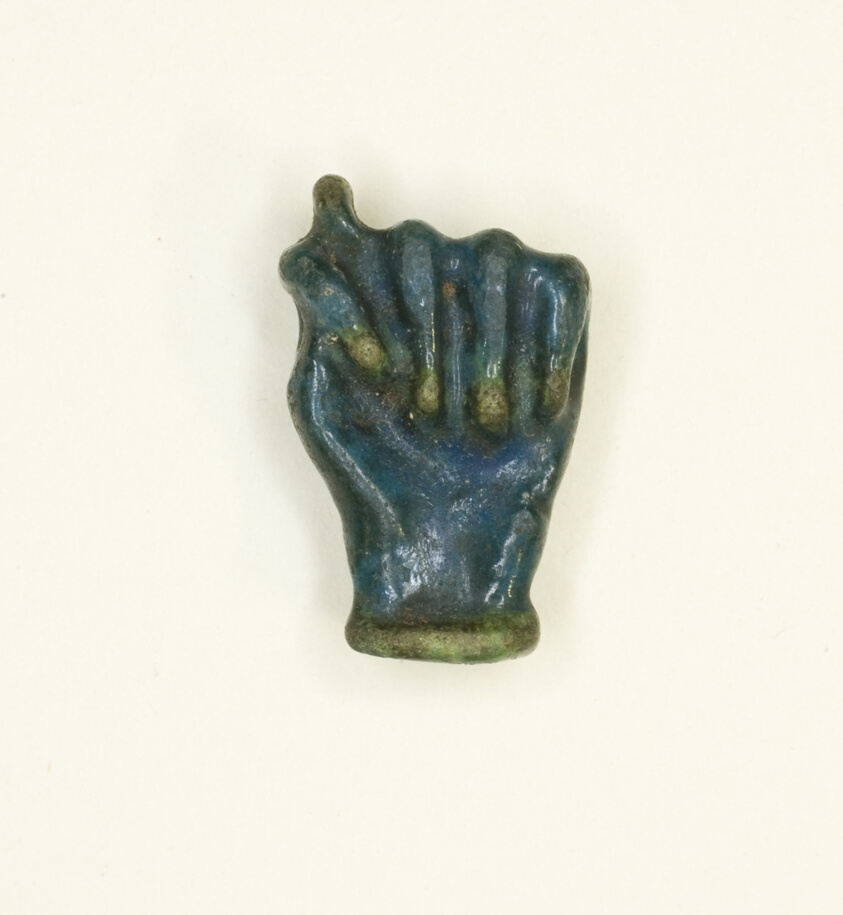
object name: Costume and Accessories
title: Amulet of a Clenched Fist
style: roman period (egyptian), greco-roman (egyptian)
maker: Egyptian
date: Roman Period (30 BCE–395 CE)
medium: Faience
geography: Egypt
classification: amulet; jewelry; ceramics; ancient art; costume; faïence (composite material)